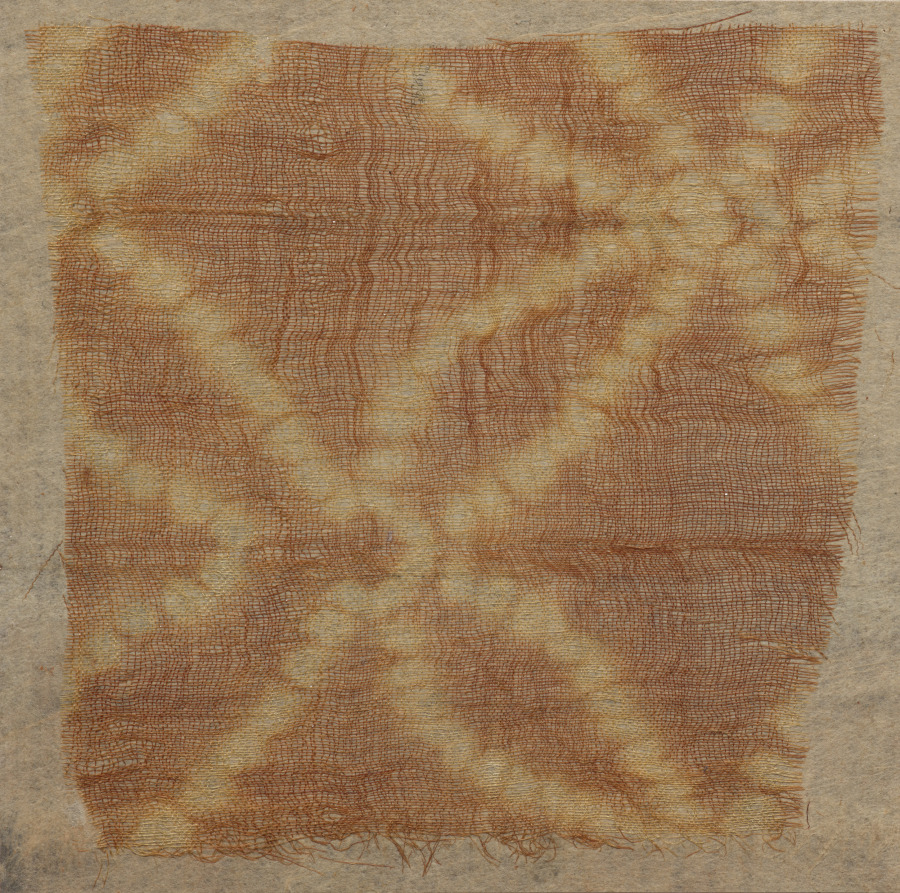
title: Fragment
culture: China or Japan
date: 700s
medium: plain cloth, resist printed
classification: Textile